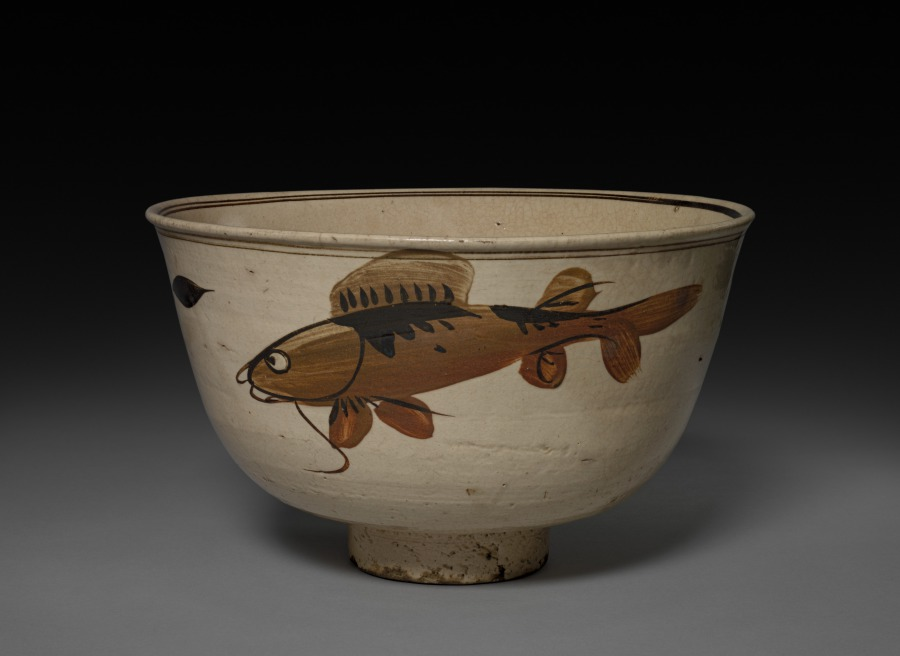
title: Bowl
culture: China, Ming dynasty (1368–1644)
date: 1368–1644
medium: stoneware, Cizhou ware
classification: Ceramic